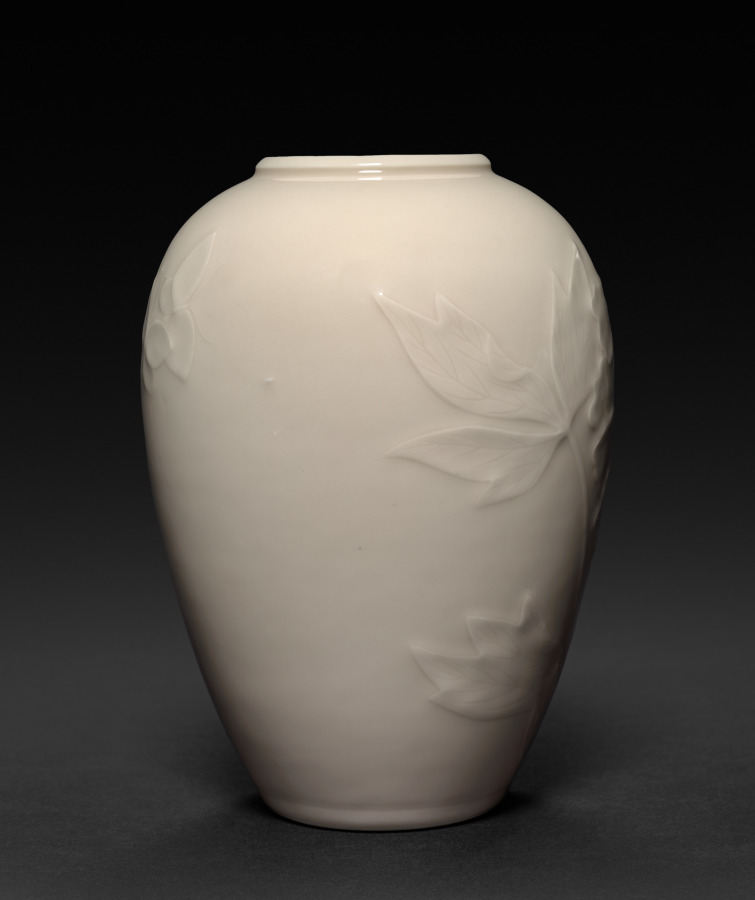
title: Vase with Peonies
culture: Japan, Meiji period (1868–1912)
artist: Seifū Yohei III (Japanese, 1851–1914)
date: 1900–1914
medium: Porcelain with molded and carved design and pink-infused cream glaze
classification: Ceramic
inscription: 清風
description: This flower vase has a creamy white glaze infused with pink. Sadly, the box has been lost, so we cannot know how it was described by the studio. However, through comparison with other works, it is possible to surmise that the work can be categorized as kanpakuji with in-glaze pink. A single huge blossom shoots up into the widest part of the vessel, near the top, so it will be visible from a distance. If this design is displayed in a space with a decorative alcove located some distance away from the entrance, even at a remove, it can announce the taste of its owner and immediately please a guest. On the other side of the vase, two butterflies, their wings overlapping, flit through the sky.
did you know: One of Seifū Yohei III’s most visually impactful techniques was to combine complex low-relief designs in clay surrounded by diffused underglaze blue or pink, which he then covered with a transparent or translucent glaze.